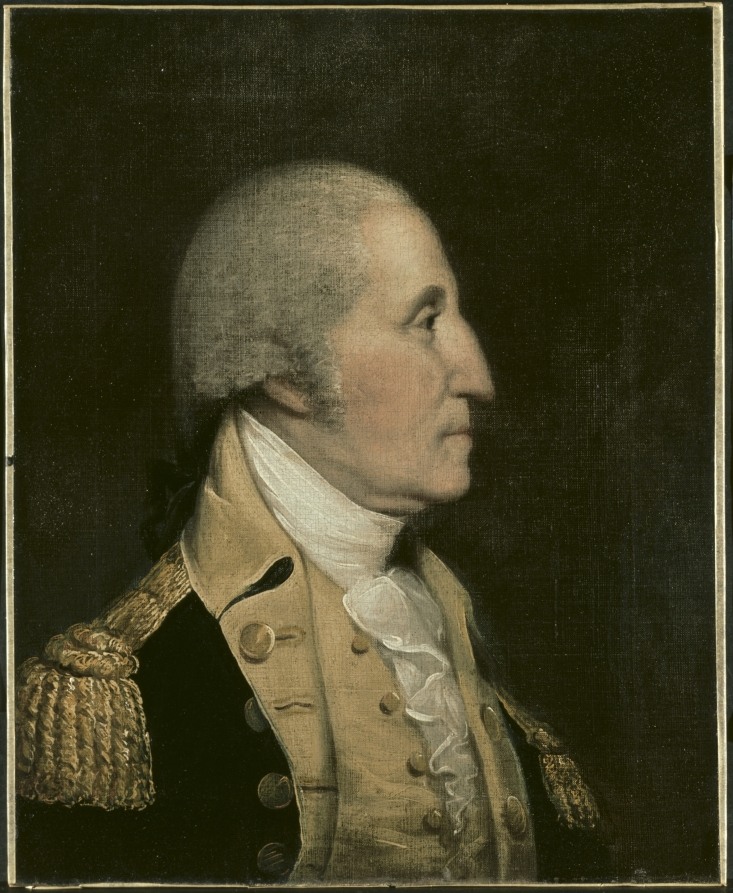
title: George Washington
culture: America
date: c. 1790s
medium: oil on canvas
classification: Painting